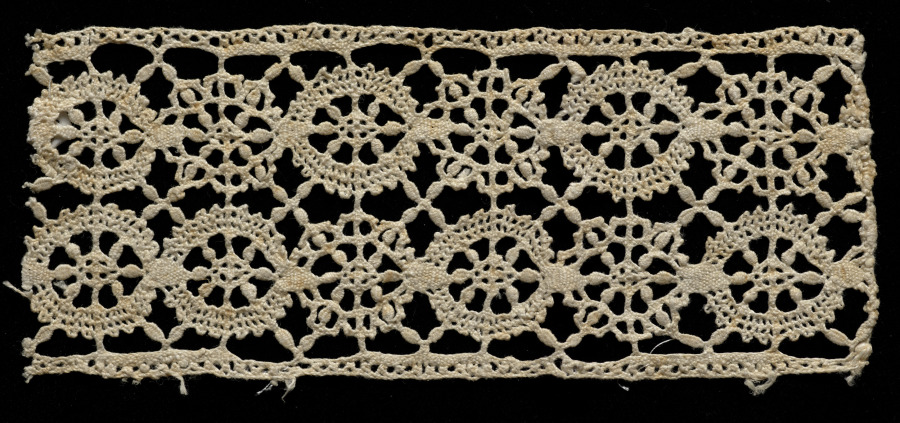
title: Lace Insertion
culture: Italy, Genoa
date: 1550–99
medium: Bobbin lace (needle lace (reticella) design)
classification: Lace